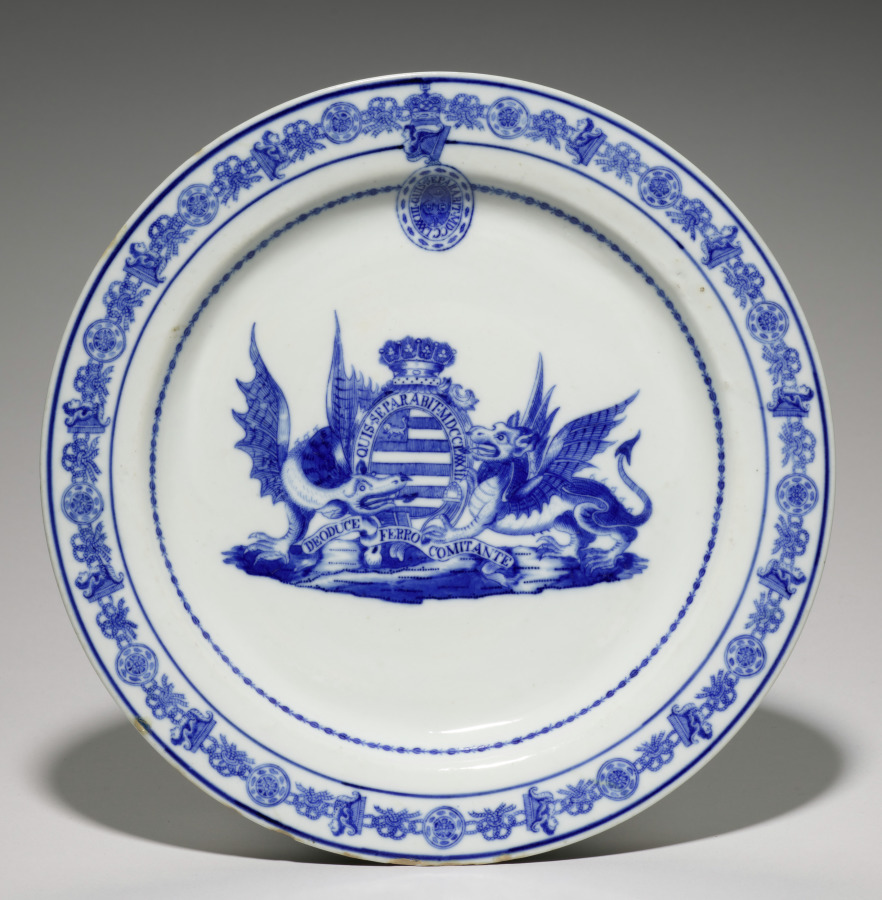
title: Plate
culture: China, Chinese Export, 18th century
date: 1783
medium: underglaze blue porcelain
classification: Ceramic